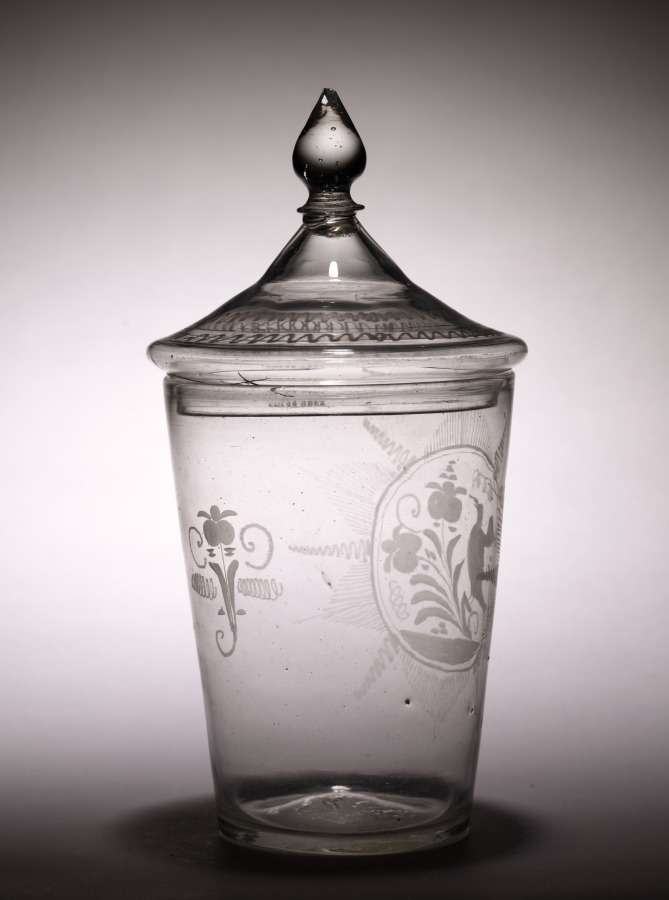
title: Flip Glass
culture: America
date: late 1700s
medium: glass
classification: Glass